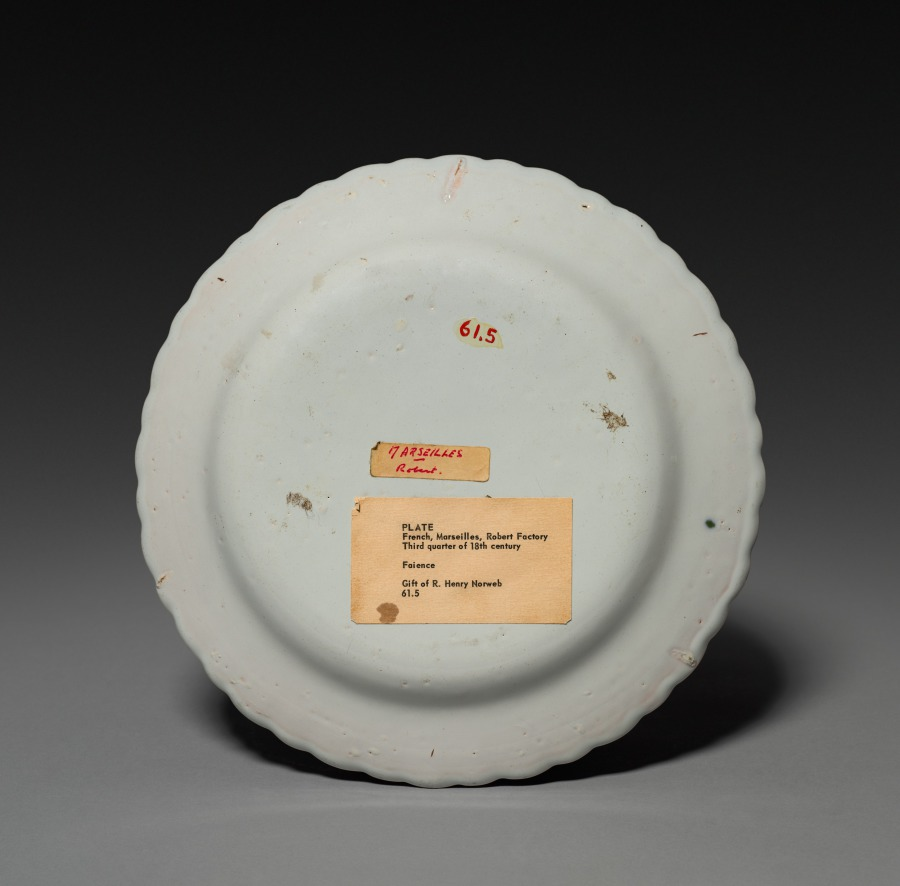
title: Plate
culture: France, Marseilles, 18th century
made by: Joesph- Gaspard Robert Factory (French)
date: 1750–1775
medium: faience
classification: Ceramic